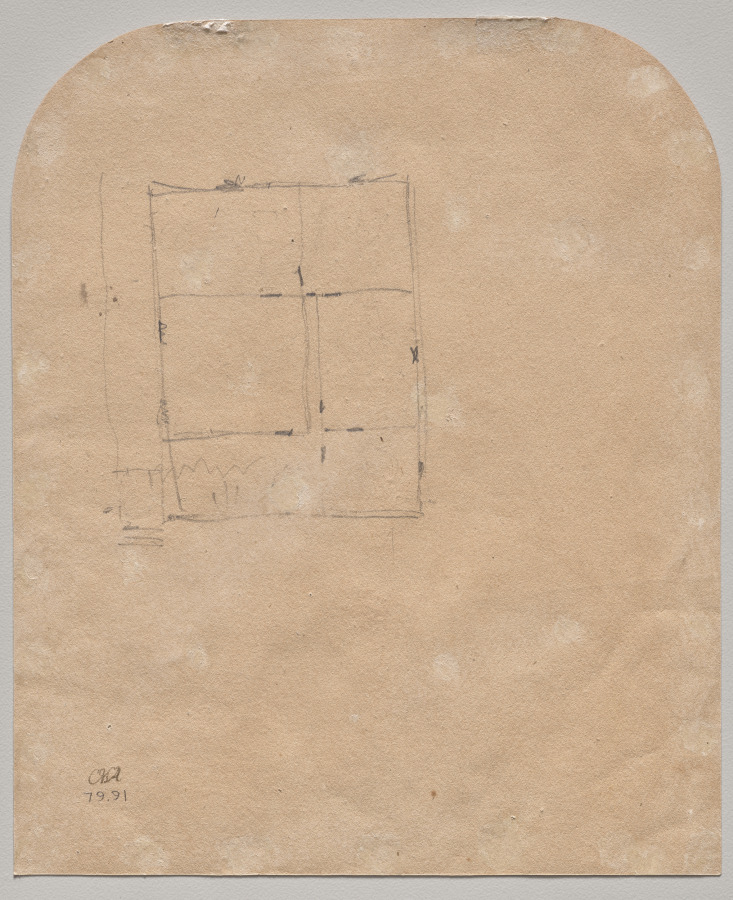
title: Floorplan (verso)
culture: America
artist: Jasper F. Cropsey (American, 1823–1900)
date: c. 1851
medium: graphite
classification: Drawing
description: This detailed drawing of a blasted tree was a study for Cropsey’s painting The Cove--A Storm Scene in the Catskill Mountains (1851).